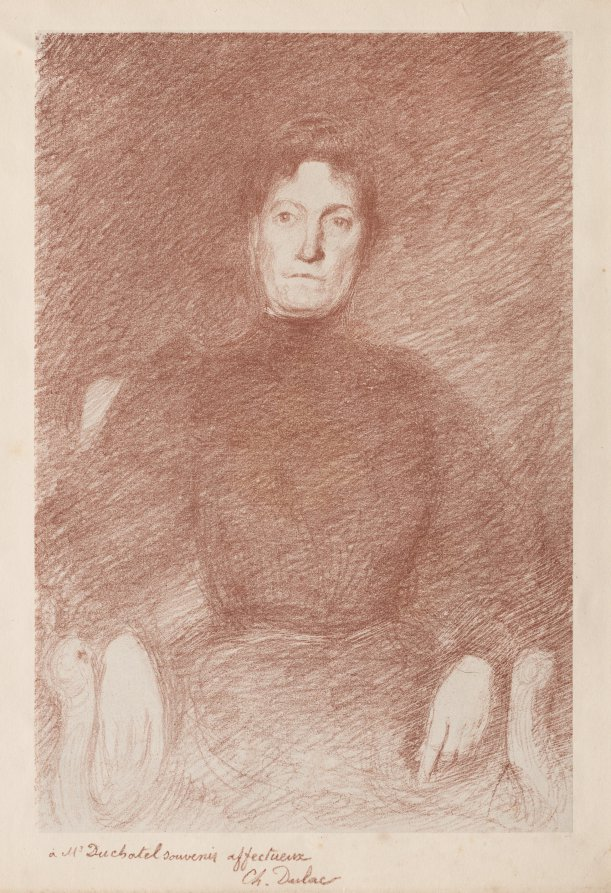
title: Seated Woman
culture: France, 19th century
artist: Charles Marie Dulac (French, 1865–1898)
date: late 1800s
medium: lithograph on chine collé printed in red-brown ink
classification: Print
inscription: in the stone, inscribed: a M Duchatel souvenir affectueux Ch. Dulac